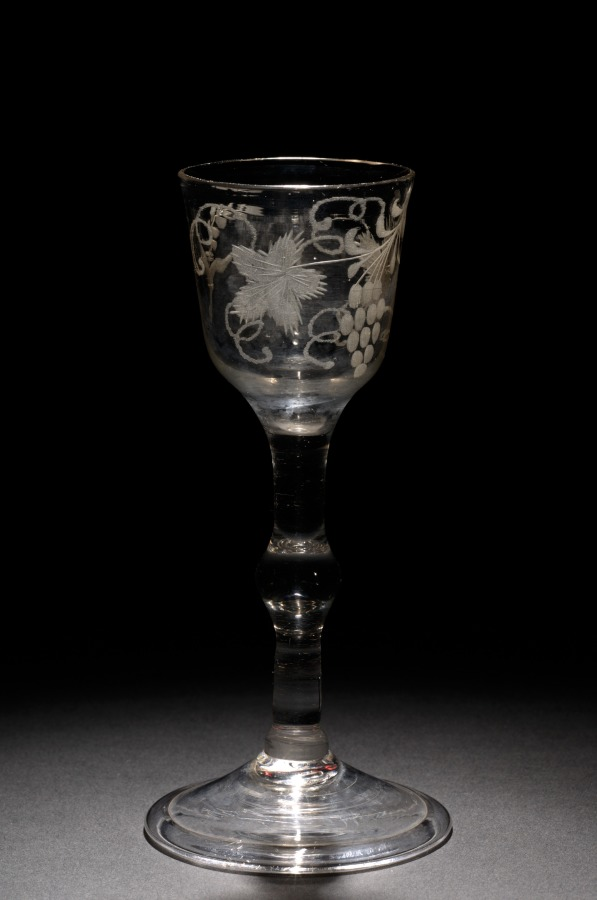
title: Wine Glass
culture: England, 18th century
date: c. 1775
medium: glass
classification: Glass